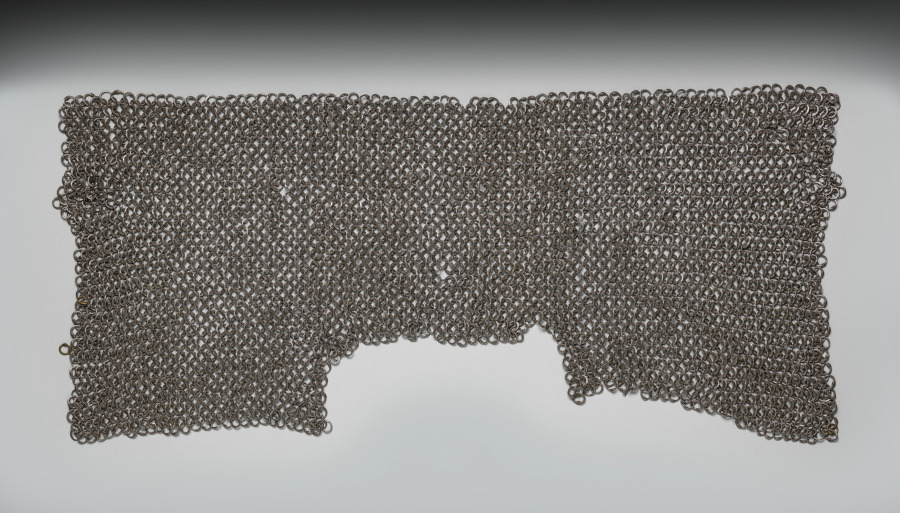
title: Chain Mail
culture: Europe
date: 1500s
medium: steel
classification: Arms and Armor